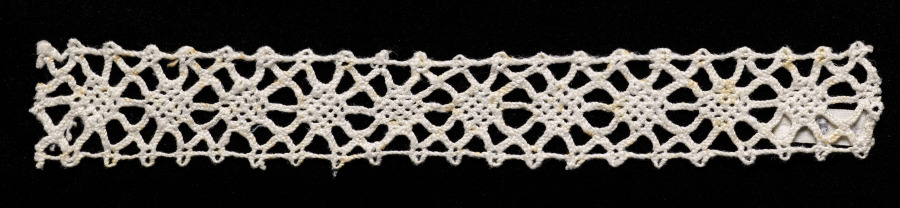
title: Lace Insertion (no selvage)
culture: Italy, Venice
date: mid-1500s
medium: Bobbin lace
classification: Lace